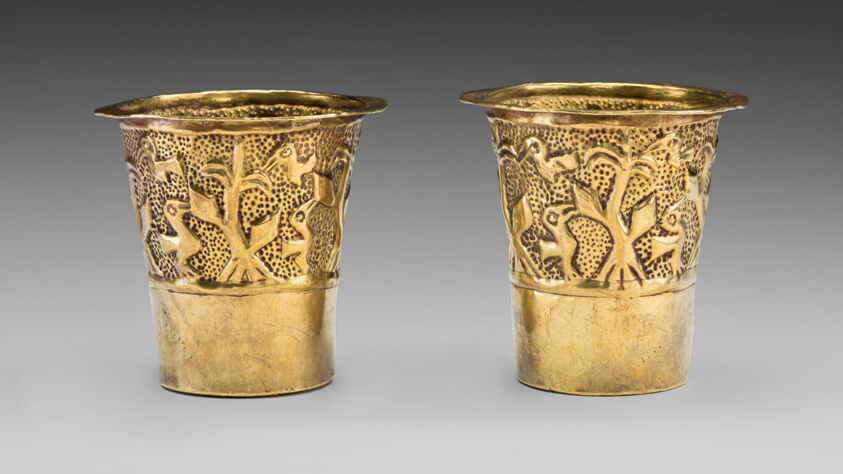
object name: Vessel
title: Pair of Beakers Depicting Birds in a Cornfield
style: inca, americas, andes, Arts of the Americas, andean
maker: Inca (Ica Valley, south coast, Peru)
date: 1100–1438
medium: Gold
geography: Ica Valley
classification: drinking vessel; gold; art of the americas; vessel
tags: landscapes, agriculture, animals, birds, offering, ritual objects